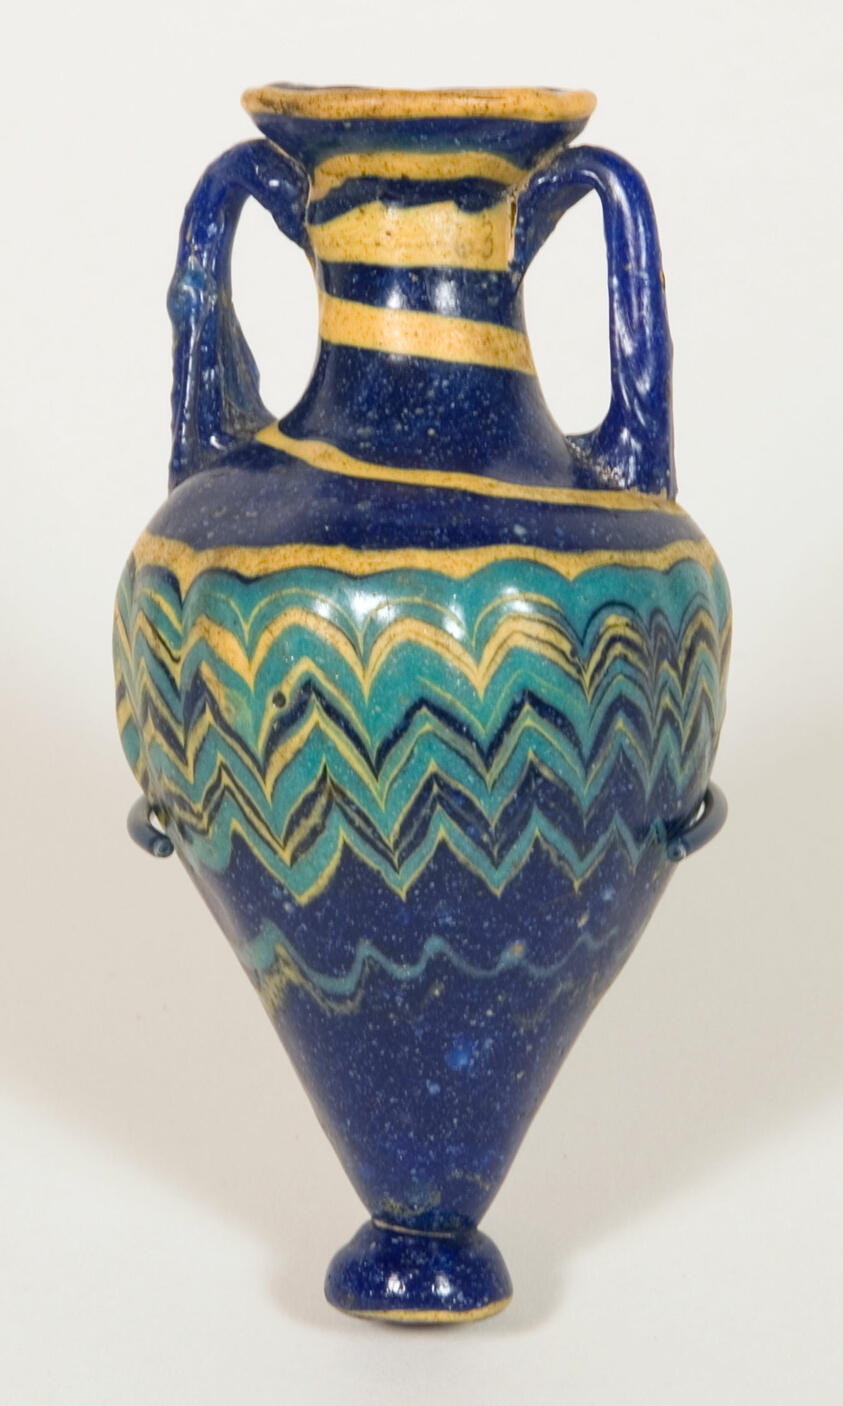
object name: Vessel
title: Amphoriskos (Container for Oil)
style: late period (egyptian)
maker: Eastern Mediterranean, possibly Rhodes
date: late 6th-early 5th century BCE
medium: Glass, core-formed technique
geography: Eastern Mediterranean Region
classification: container; amphoriskos; glass; vessel; ancient art